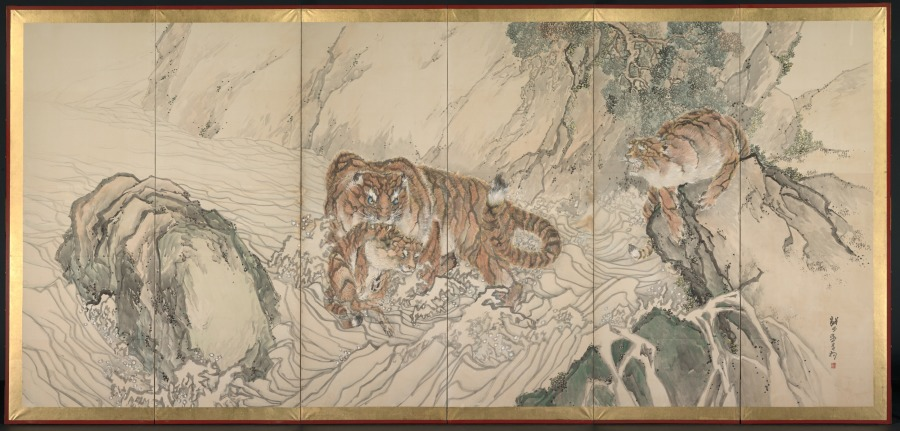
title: Tiger Family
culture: Japan, Edo period (1615–1868)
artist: Kishi Ganku (Japanese, 1749/56–1838)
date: early 1800s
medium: Pair of six-panel folding screens; ink and color on paper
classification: Painting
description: By the time this self-taught painter reached his thirties, his paintings were keenly sought after by Kyoto’s sophisticated patrons, including members of the imperial family. Judging from the surviving works, his supporters delighted in the colorful, auspicious imagery of Chinese historical figures, blossoming plum trees, cranes, peacocks, roosters, and especially tigers. Kishi Ganku was originally from the coastal town of Kanazawa, but relocated to Kyoto to work for the Arisugawa family. His work incorporates stylistic elements from the Kano school, the Maruyama school, and works by the Chinese artist Shen Nanping (1682–1760).